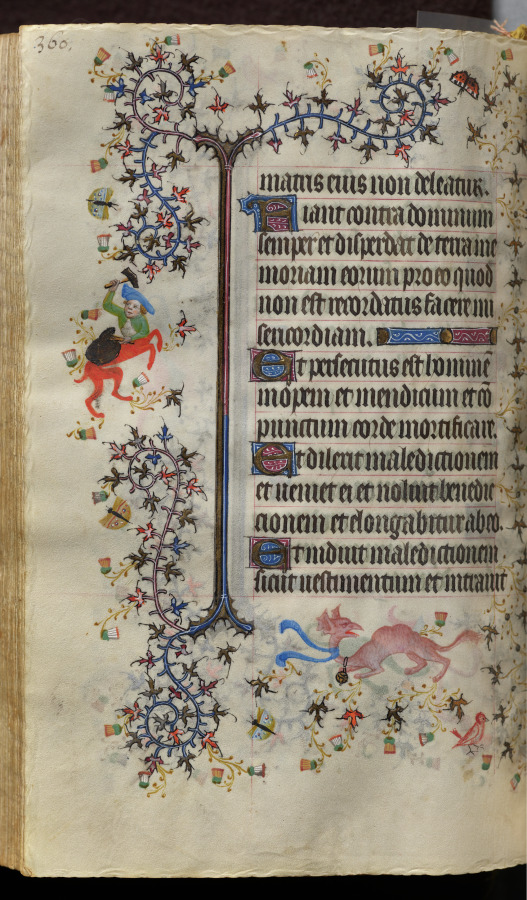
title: Hours of Charles the Noble, King of Navarre (1361-1425): fol. 175v, Text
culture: France, Paris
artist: Master of the Brussels Initials and Associates (French)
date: c. 1405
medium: ink, tempera, and gold on vellum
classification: Bound Volume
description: This precious volume was obviously highly prized by its owner, the French-born King of Navarre, who had his coat of arms painted on no less than twenty folios. Rather than directly commissioning this manuscript from a specific workshop, it seems that Charles the Noble acquired his book of hours -- perhaps ready-made for the luxury market -- while on a trip to Paris in 1404-05. A collaborative effort, six painting styles are evidenced within the pages of this codex, those of two Italians, two Frenchmen, and two Netherlanders. The painter who was responsible for the planning and decoration of the book, and who produced seventeen of the large miniatures, was a Bolognese artist known as the Master of the Brussels Initials. His principal assistant, responsible for most of the borders, was a Florentine who signed his name "Zecho" da Firenze on folio 208 verso.